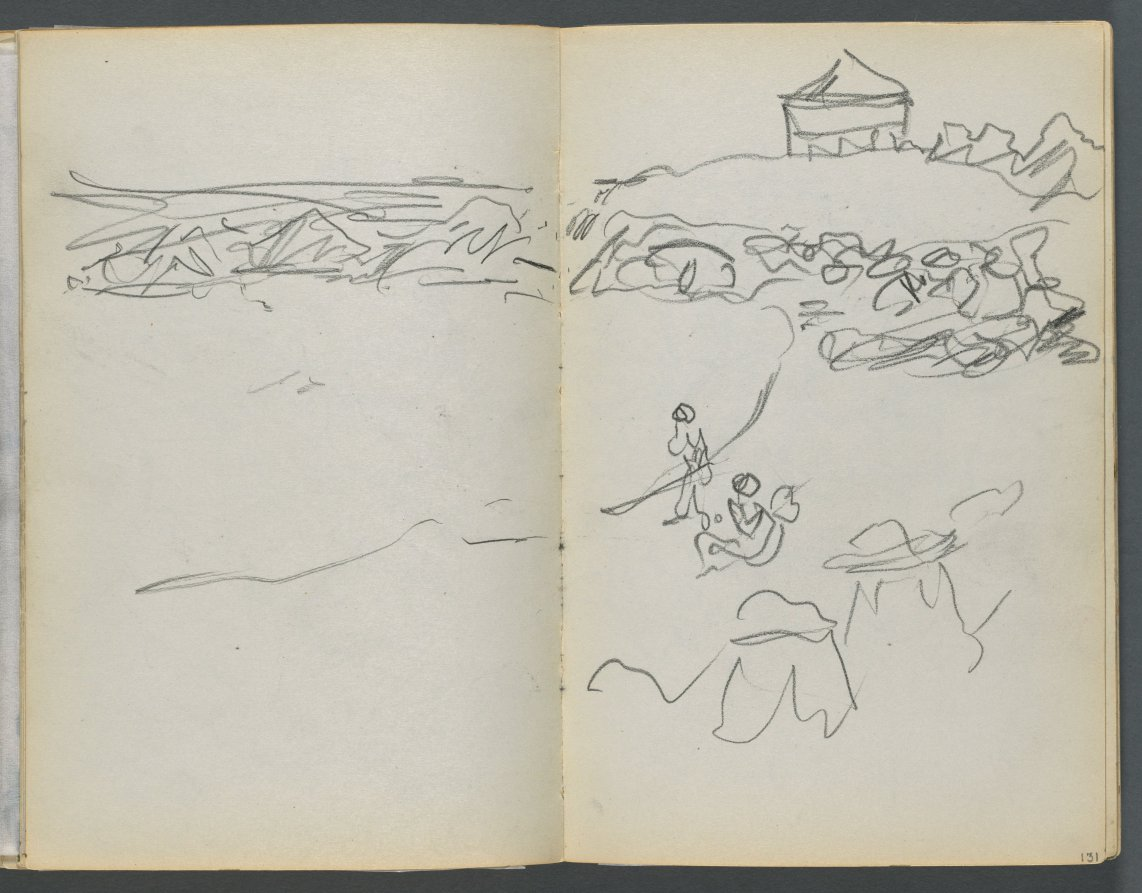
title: Sketchbook, The Dells, N° 127, page 130 & 131: Coastal View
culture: America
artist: Maurice Prendergast (American, born Newfoundland [now Canada], 1858–1924)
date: c. 1919–1921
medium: graphite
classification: Bound Volume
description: This sketchbook contains 59 pages of graphite drawings and 16 watercolors made at various locations on Cape Ann, Massachusetts.